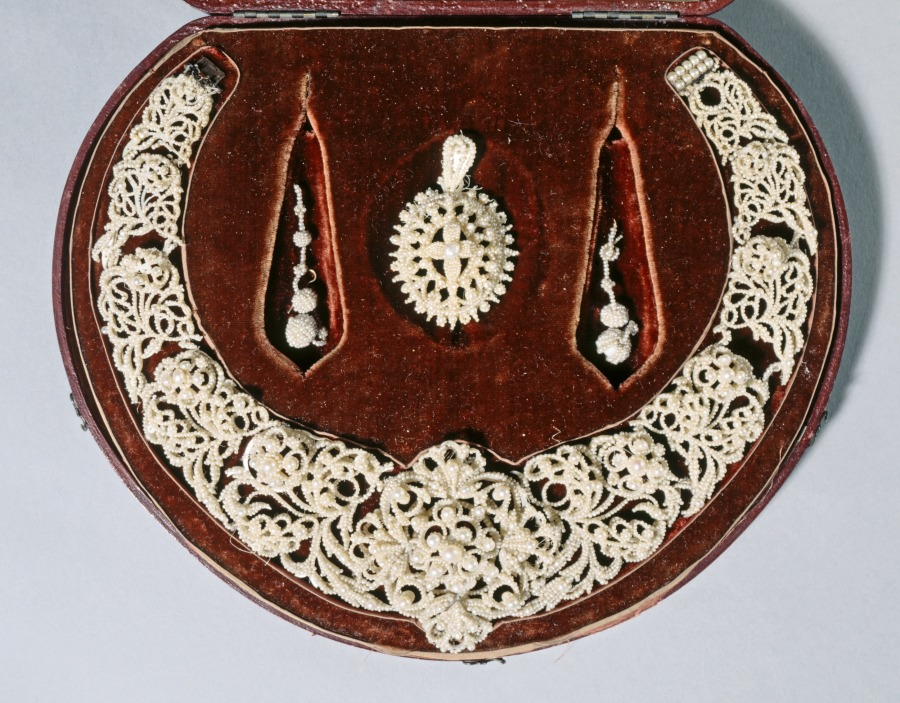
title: Parure: Necklace, Pendant, Earrings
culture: England, 19th century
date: c. 1850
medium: seed pearl on mother-of-pearl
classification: Jewelry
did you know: A parure is a set of various items of matching jewelry popular in Europe in the early 1800s; they could include a variety of pieces such as a necklace, earrings, brooch, bracelet, or tiara.